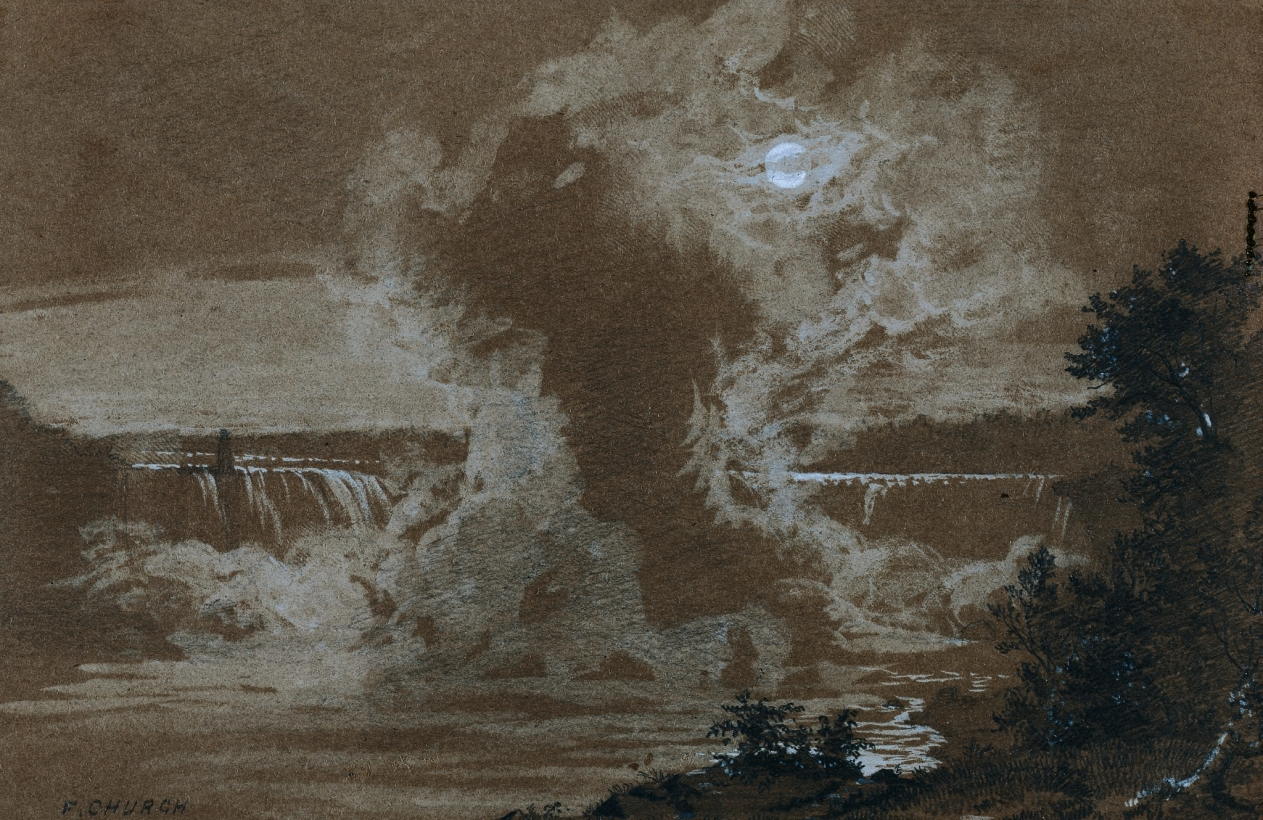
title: Niagara Falls by Moonlight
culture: America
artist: Frederic Edwin Church (American, 1826–1900)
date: probably 1856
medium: graphite and white gouache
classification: Drawing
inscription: signed?, lower left, in graphite: f. church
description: By the time Frederic E. Church executed this study of the Canadian side of Horseshoe Falls, Niagara Falls was already an icon of both American art and the American nation. Tourists and artists flocked to the falls in pursuit of a firsthand experience of the sublime, a sensation of elation and terror that portrayals of Niagara Falls had notorious difficulty reproducing. Church’s celebrated oil painting The Great Fall, Niagara (1857) was one of the few depictions believed to capture the fall’s power in pictorial terms. Like many artists of the Hudson River School, Church used drawings made on site to preserve the visual memory of the place he intended to paint in oil. Cleveland’s sheet was possibly executed during one of the four trips he took to the falls in 1856 to prepare for Niagara. As a night scene, this study in light and shadow is unusual among Church’s drawings. The dark brown paper enhances the image’s nocturnal quality and allowed Church to render the atmospheric effects of mist and clouds. He used white gouache not only as a highlight, but also to define the luminous forms of water and vapor, crafting the landscape’s substance out of negative and positive space. On the picture’s left-hand side, Church represented the man-made Terrapin Tower in shadowy miniature, a testament to his interest in site-specific details—and also, perhaps, a reminder of the diminutive status of human creation in the face of awesome natural forces.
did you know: In this drawing, Church manipulates negative space—the space around and between his drawn subjects—to suggest the forms of water and smoke.